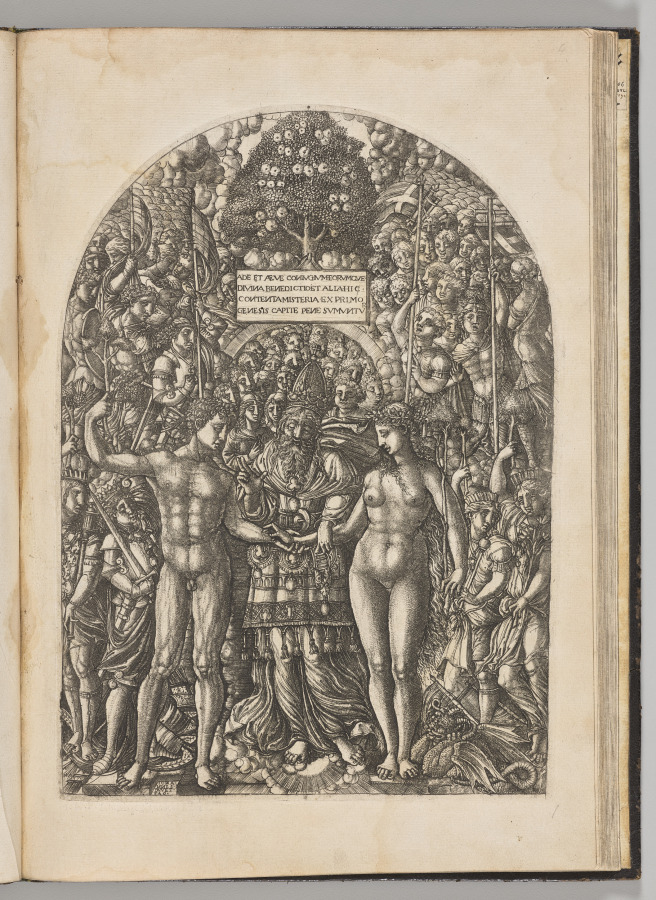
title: Marriage of Adam and Eve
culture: France, 16th century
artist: Jean Duvet (French, 1485–1561)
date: 1555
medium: engraving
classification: Print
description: This print is part of a bound volume of works illustrating the a narrative of the Apocalypse, taken from the Revelation of Saint John in the Bible. The 23 engravings in the series occupied the artist for a number of years and represent his greatest artistic achievement. The museum's volume is one of only seven known complete sets. Jean Duvet was one of the first major printmakers in France and one of the most original artists of the 1500s. Although he worked mostly in the provincial city of Langres, he became aware of Italian art through the circulation of prints—notably those of Marcantonio Raimondi. His solidly modeled human figures reflect the influence of the Italian High Renaissance. Duvet, however, developed an idiosyncratic, highly artificial style with crowded compositions that ignore rational space in favor of ornamental surface patterns.